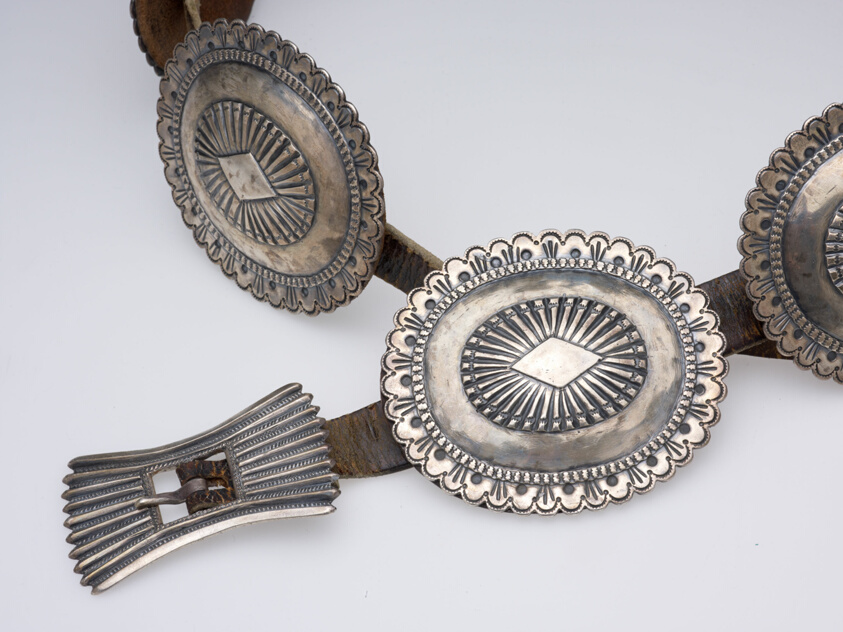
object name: Costume and Accessories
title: Concho Belt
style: navajo, dine, americas, native american, native north american, Arts of the Americas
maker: Navajo (Diné) (Northern New Mexico or Arizona, United States)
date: 1880s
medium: Silver and leather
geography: New Mexico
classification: belts (costume accessory); art of the americas; costume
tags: costume, geometric, silver (color), ornaments